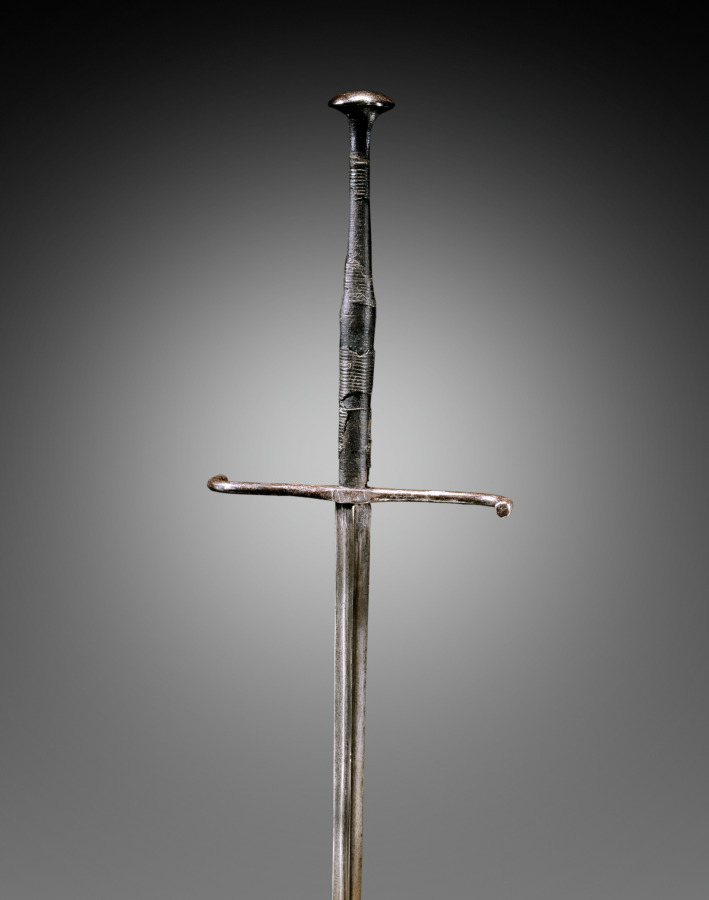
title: Estoc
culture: Germany, early 16th Century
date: early 1500s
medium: steel, wood and leather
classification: Arms and Armor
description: The French word estoc means "thrust" and therefore was adopted as the name for this long thrusting sword. It has a fairly long grip and simple cross-shaped hilt. The rigid blade, designed for thrusting at armored opponents, is three-sided for strength. The estoc was sometimes carried from the saddle. From the early 1300s, it was used by cavalrymen as an auxiliary side arm when a horseman had dismounted.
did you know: Swords like this one were developed to counteract and pierce the increasingly heavy armor and sophisticated plates that nearly covered a knight.